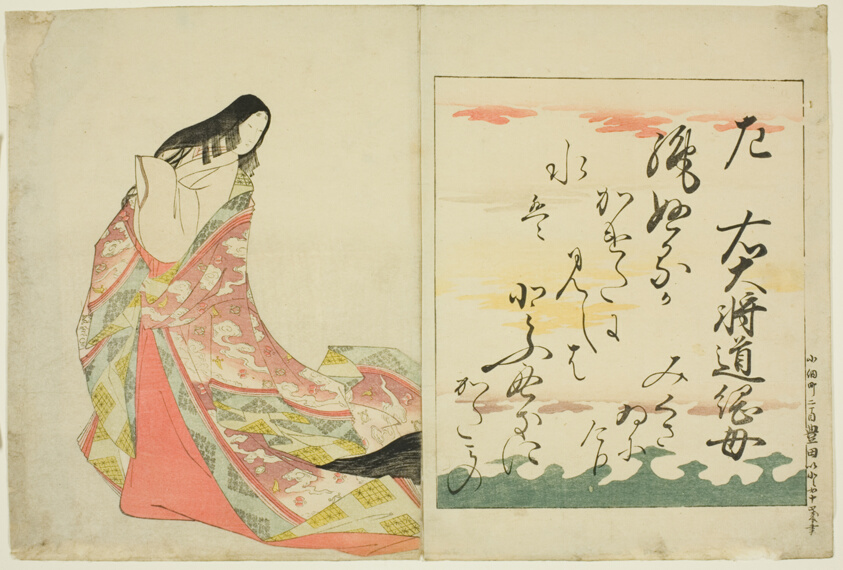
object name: Print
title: The Poetess Michitsuna no Haha, from the series "The Thirty-six Immortal Women Poets (Nishikizuri onna sanjurokkasen)"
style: Japanese (culture or style)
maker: Chobunsai Eishi; Japanese, 1756-1829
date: Edo period (1615–1868), 1801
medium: Pages from a color woodblock-printed volume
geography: Japan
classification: woodblock print; print; asian art